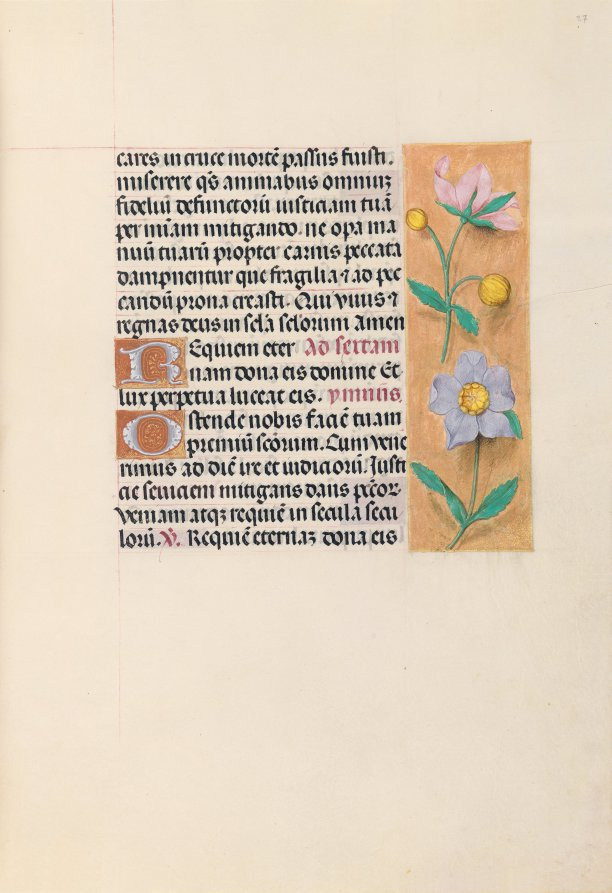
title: Hours of Queen Isabella the Catholic, Queen of Spain: Fol. 27r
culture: Flanders, Ghent and Bruges, late 15th century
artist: Master of the First Prayerbook of Maximillian (Flemish, c. 1444–1519)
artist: and Associates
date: c. 1500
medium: ink, tempera, and gold on vellum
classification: Bound Volume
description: A great lover of Flemish art, Queen Isabella treasured her many devotional books. This deluxe manuscript was created for her private devotions by highly organized and distinctly talented manuscript painters active in Ghent and Bruges. The Ghent-Bruges school represents the culmination of Flemish book painting, whose main features were the use of rich colors, illusionistic effects, a love of landscape, and a strong sense of visual narrative. Manuscripts produced by this circle of artists are renowned for their border decoration featuring a rich variety of realistically painted flowers, scrolling acanthus leaves, birds, and butterflies.